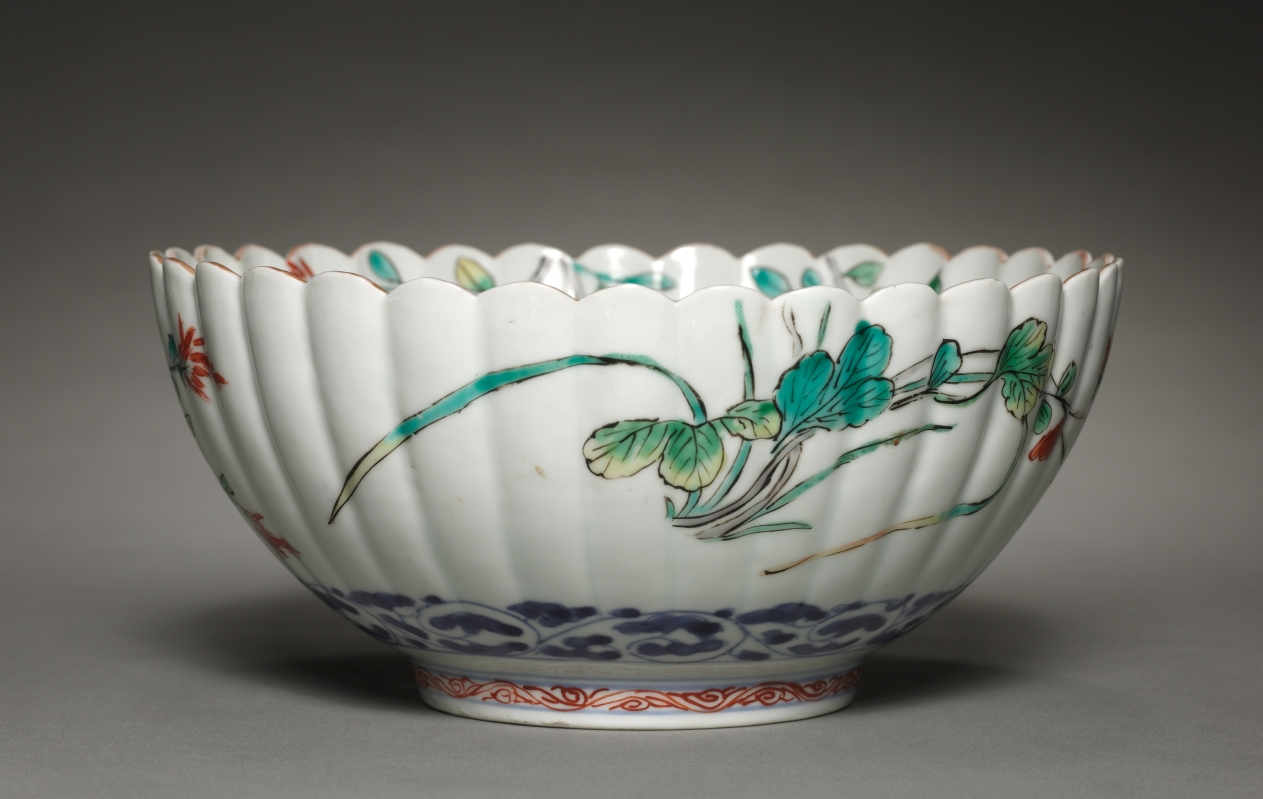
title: Fluted Bowl with Dragon, Butterfly, and Flowers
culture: Japan, Edo period (1615–1868)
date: early 1700s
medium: Porcelain with underglaze blue and overglaze color enamels and gold (Hizen ware, Kakiemon type)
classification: Ceramic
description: A dragon encircled by sprays of flowers and a butterfly enliven the interior of this fluted bowl. The exterior has similar decoration, with touches of gold on some petals. The flutes enhance both the visual and tactile experience; their tapered forms draw the eye from the edges inward and provide ridges for the hands.